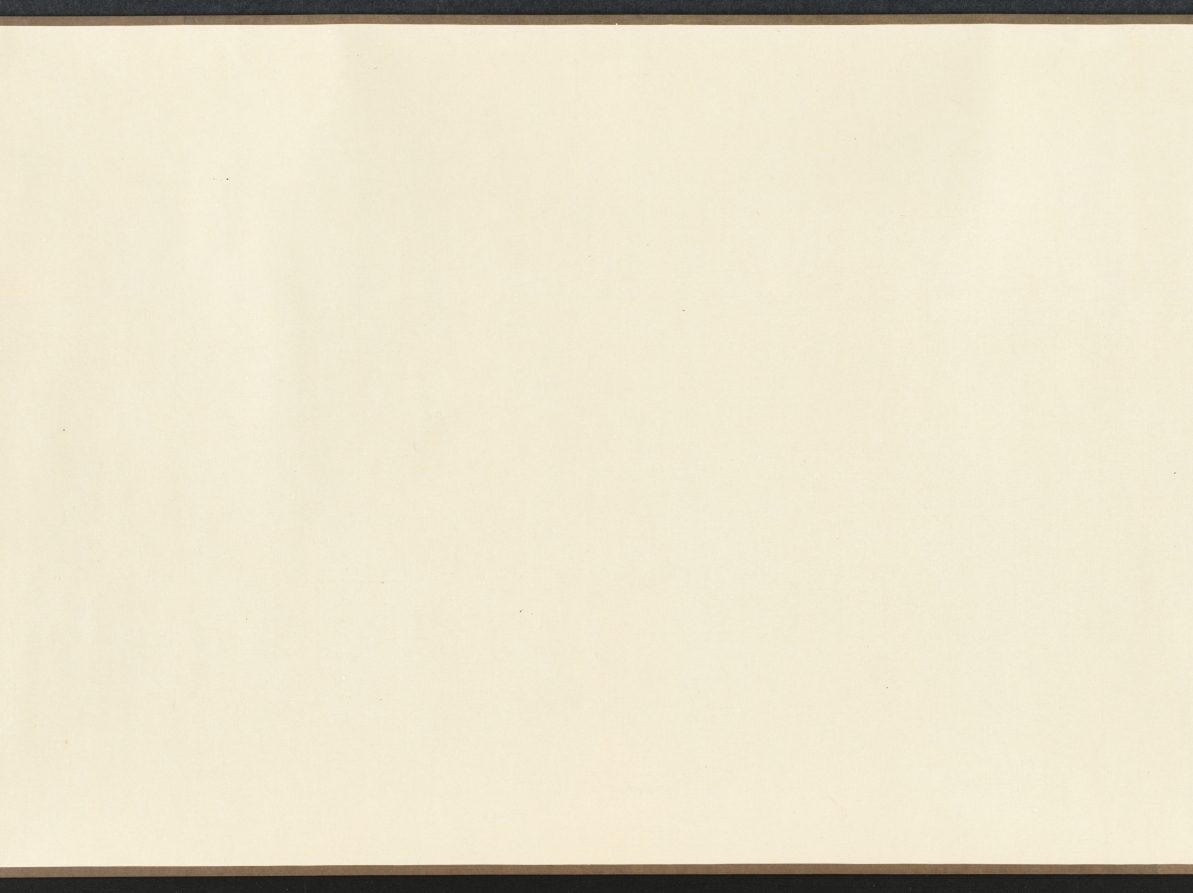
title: Ink Flowers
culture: China, Yuan dynasty (1271-1368)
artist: Zhao Zhong (Chinese, second half of the 1300s)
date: 1361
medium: Handscroll; ink on paper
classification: Painting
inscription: 寶帶同心結，香羅合歡扇。/ 繡作錦鴛鴦，雙雙為君獻。/ 薔薇露灑熏籠衣，馨香奉君君勿違。 原初并題。 [印] 趙衷原初畫記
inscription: 翠袂素羅韈，玉臺黃金盃。浩歌渡弱水。天風卷海三山開，麻姑方平為招飲，蛟宮獻舞銀濤堆。 原初并題。 [印] 雲林清趣、[印] 趙衷原初畫記。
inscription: 右用湯叔雅慶元中所寫墨花法作此卷，又效李長吉體賦詩以題之。詩與畫雖未工，要皆出於古人之餘，譬猶欲成方圓而必求其規矩之用也，識者毋誚焉！至正辛丑八月望日，東吳野人趙衷原初謹識。 [印] 趙原初、[印] 傳世清玩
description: Zhao Zhong's flowers, each paired with a poem, echo the fine-style colored flowers of the academic tradition, but instead he used only ink. Fine lines define the contours of each plant, as well as the veins within each petal and leaf. Careful ink washes give subtle modeling to the forms. The combination of lily, narcissus, and peony is unusual as the three belong to no known seasonal or symbolic system popular in the fourteenth century. Zhao’s medical training may have influenced the selection. Powdered lilies, for example, were prescribed to dispel grief, while the bark of tree peony roots was used as a treatment for various blood disorders.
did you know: This handscroll is a very rare example of ink flowers in the linear baimiao style of the fourteenth century.